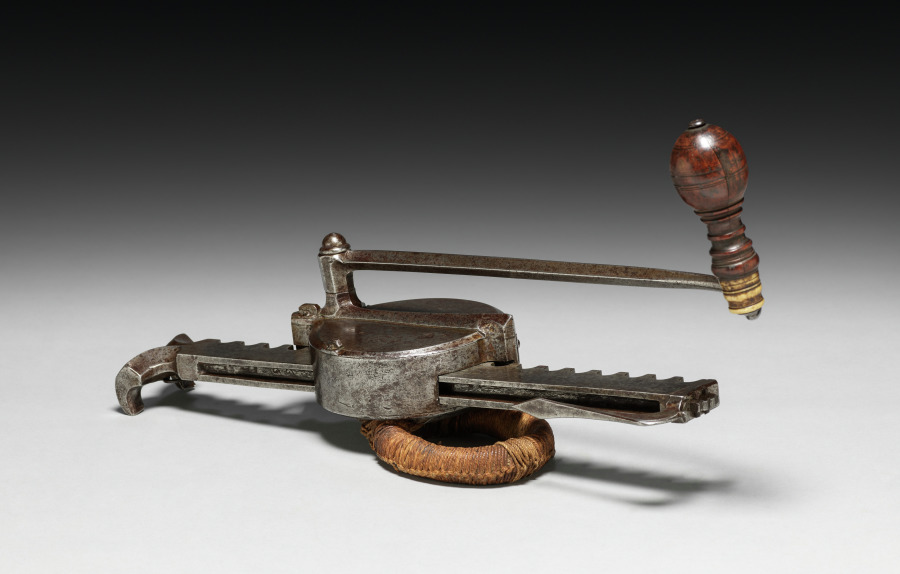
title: Cranequin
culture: Germany, Nuremberg (?), 16th century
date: c. 1580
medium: steel, flax cord, wooden handle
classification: Arms and Armor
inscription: gear case inscribed with later owner's name: CW Siball, 1665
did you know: The maker's mark says HW and may belong to Hans Wirsing, a craftsman from Nuremburg.